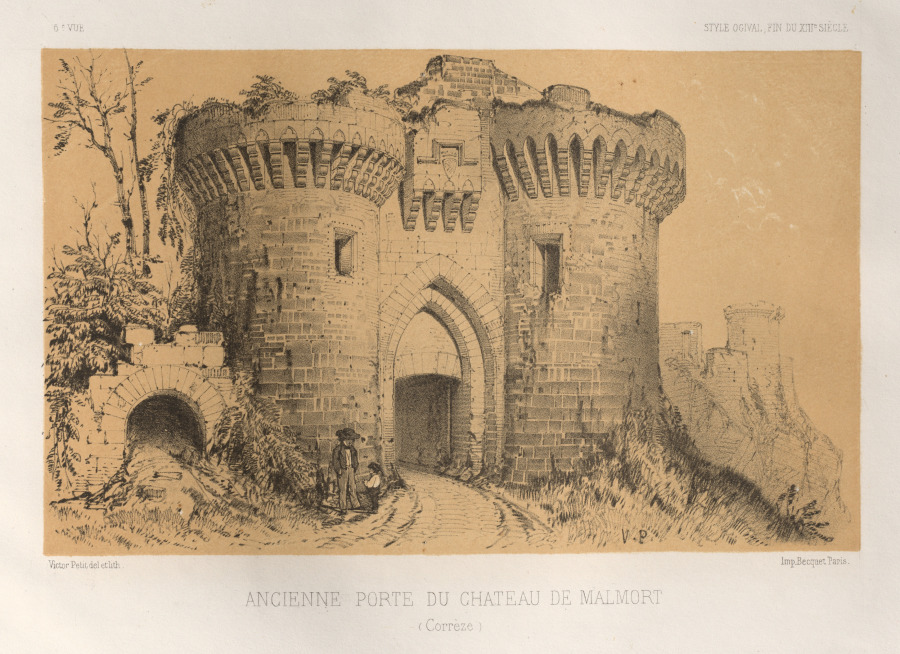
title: Architecture Pittoresque ou Monuments des xveme. Et xvieme. Siecles: Chateaux De France des XV et XVI Siecles: Pl.6, Ancienne Porte Du Chateau De Malmort (Correze)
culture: France, 19th century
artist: Victor Petit (French, 1817–1874)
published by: Charles Boivin (publisher and editor); Lith de Godard a Paris (printer)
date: 1860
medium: lithograph with tint stone, from portfolio of 100 lithographs with tint stone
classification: Print